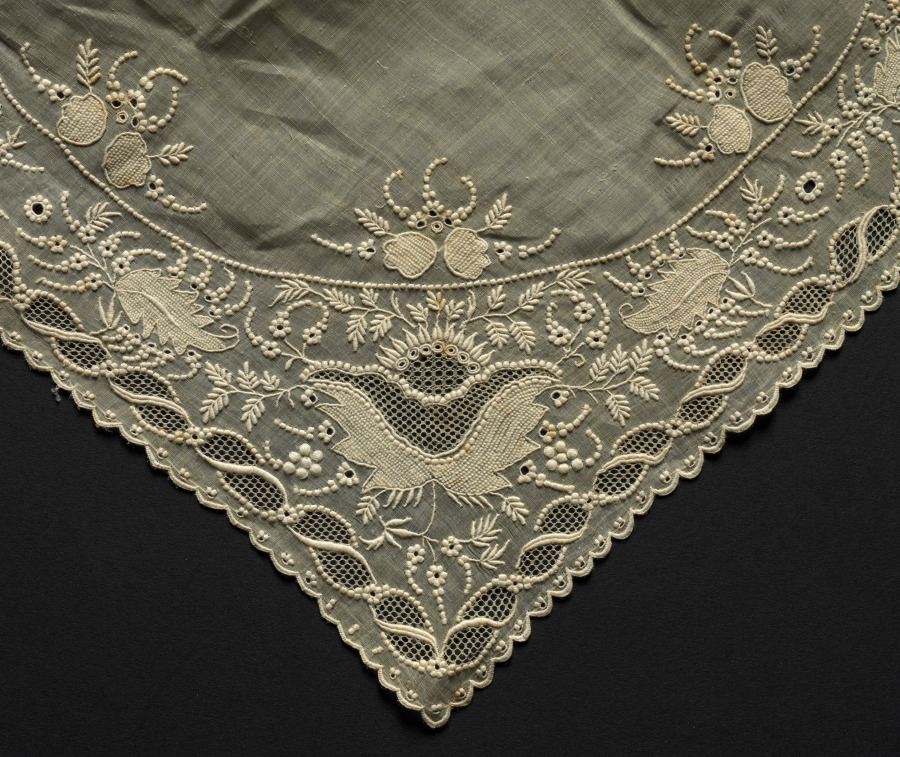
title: Handkerchief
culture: Madeira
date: 1800s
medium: Plain weave cotton (est.): needle lace (drawnwork) and linen embroidery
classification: Embroidery